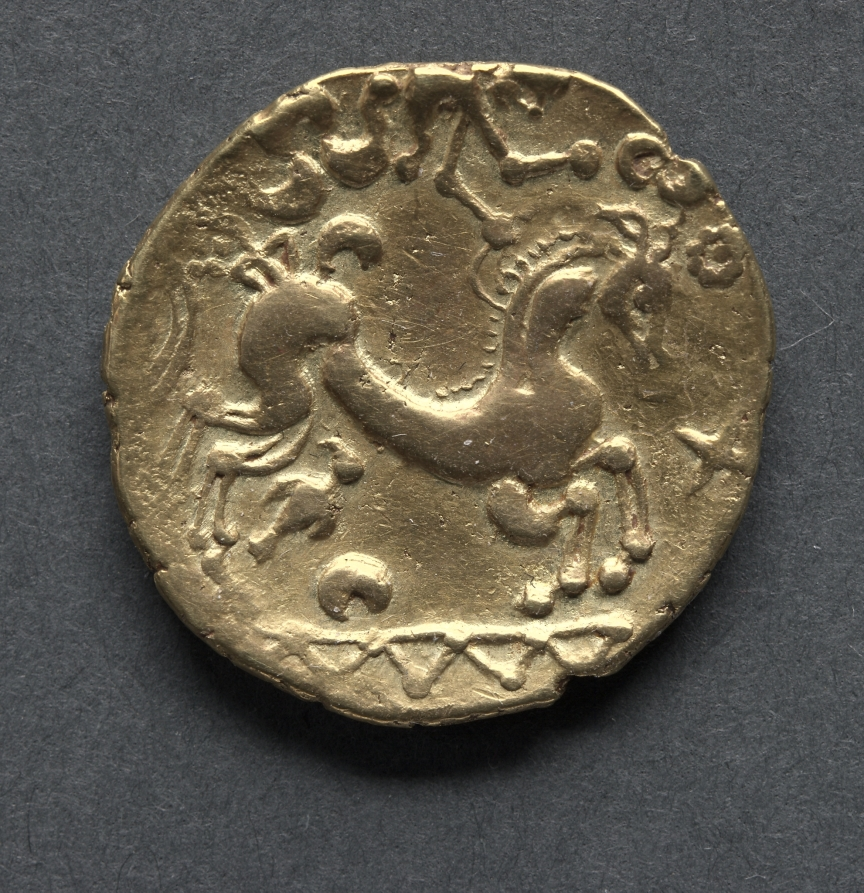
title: Bellovaci Stater: Horse with Victory Above (reverse)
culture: England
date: c. 125–100 BCE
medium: gold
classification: Coins